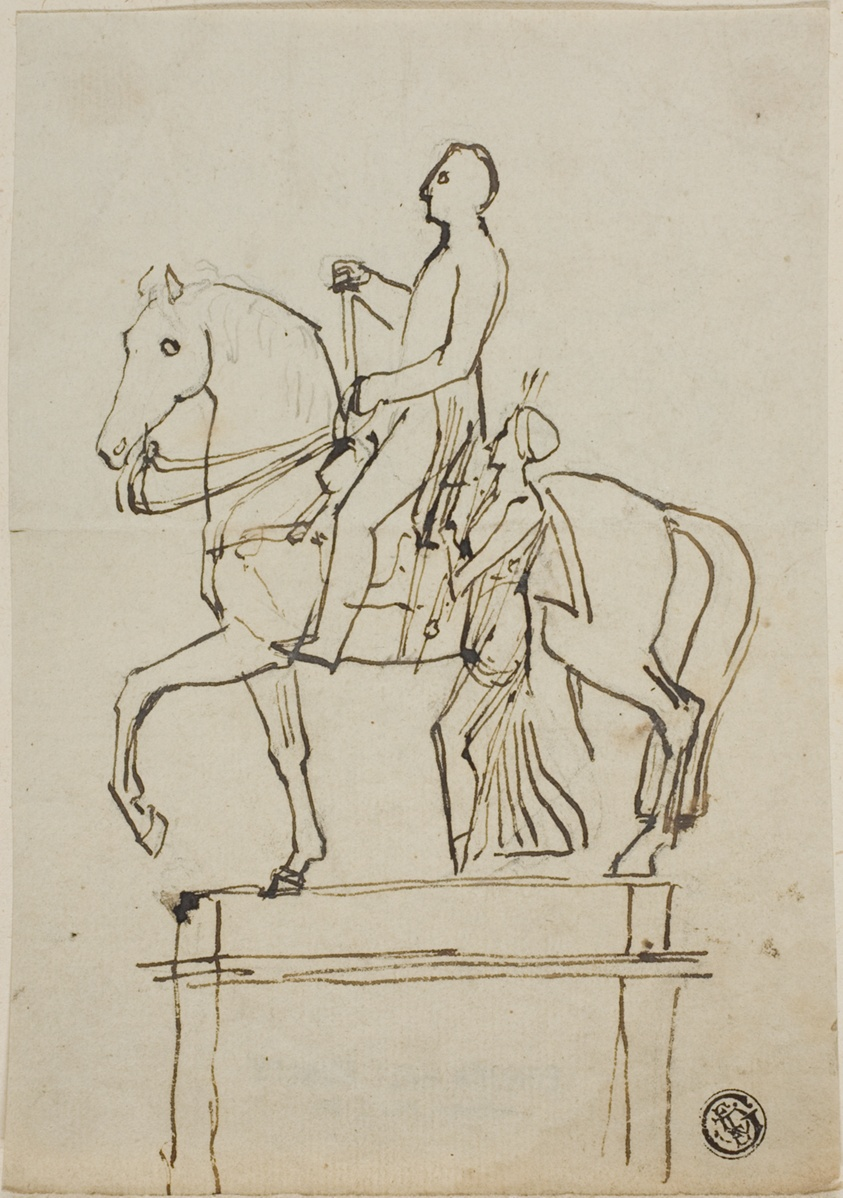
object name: Drawing and Watercolor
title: Sculpture of a Horseman Accompanied by Standing Woman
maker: Attributed to Thomas Stothard; English, 1755-1834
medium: Pen and brown ink over graphite, on gray laid paper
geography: England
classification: pen and ink drawings; drawings (visual works); prints and drawing